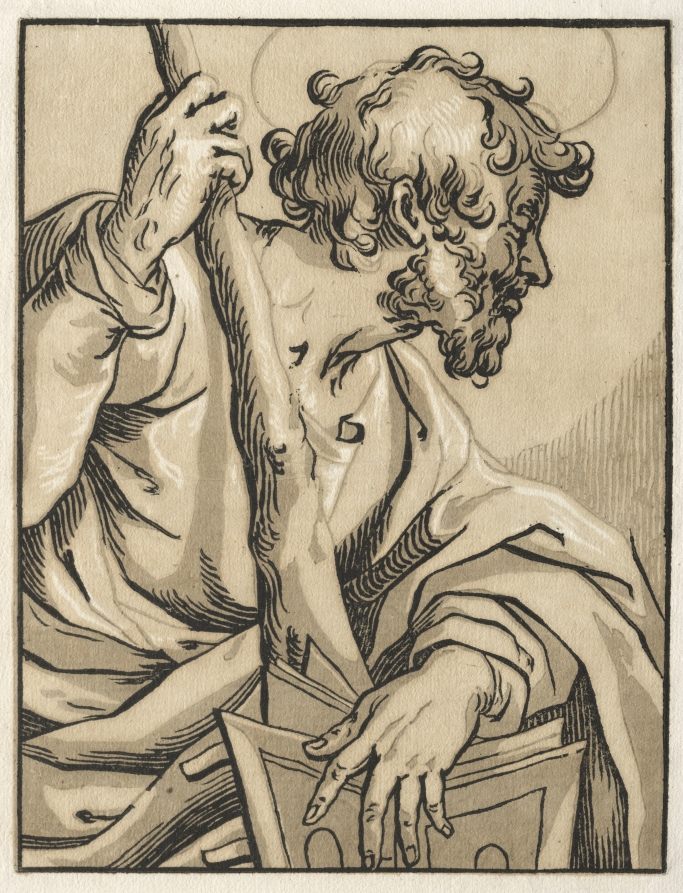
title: Christ and the Apostles: St. Judas Thaddeus (with the Club)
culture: Germany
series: Christ and the Apostles, no. 10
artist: Ludolph Büsinck (German, 1590–1669)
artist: after G. Lallemand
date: 1600s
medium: chiaroscuro woodcut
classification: Print